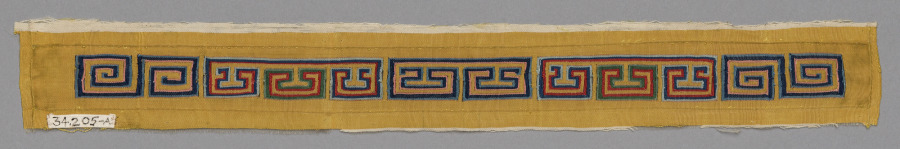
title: Cushion Cover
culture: China, Qing dynasty (1644-1911)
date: 1700s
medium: silk, metallic thread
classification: Textile